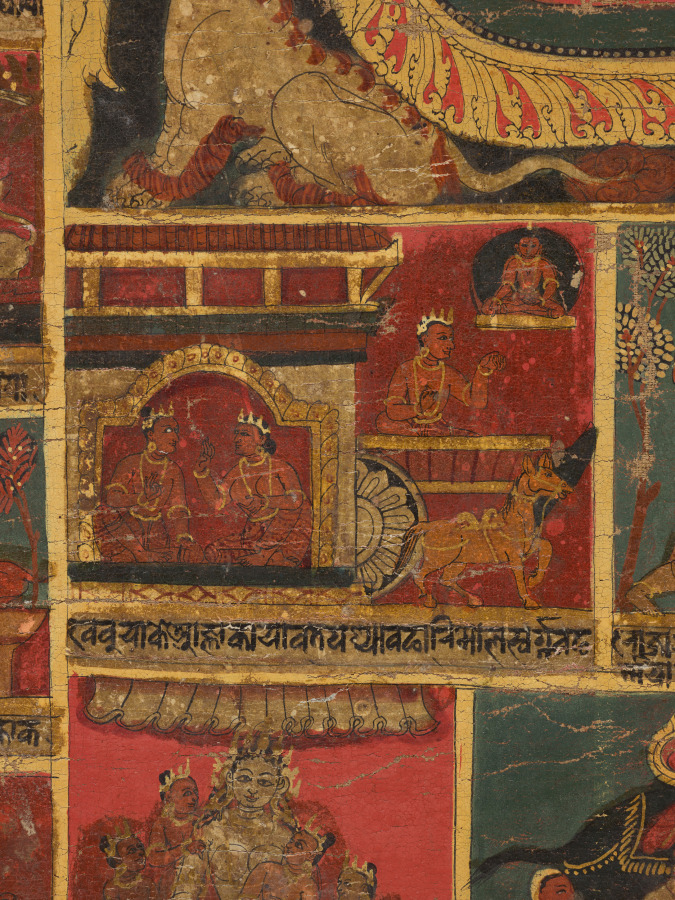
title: Bejeweled Buddha Preaching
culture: Nepal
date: 1648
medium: Gum tempera, ink, and gold on cloth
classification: Painting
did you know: Nepalese devotional paintings on cloth are called "paubha" in the Newari language.